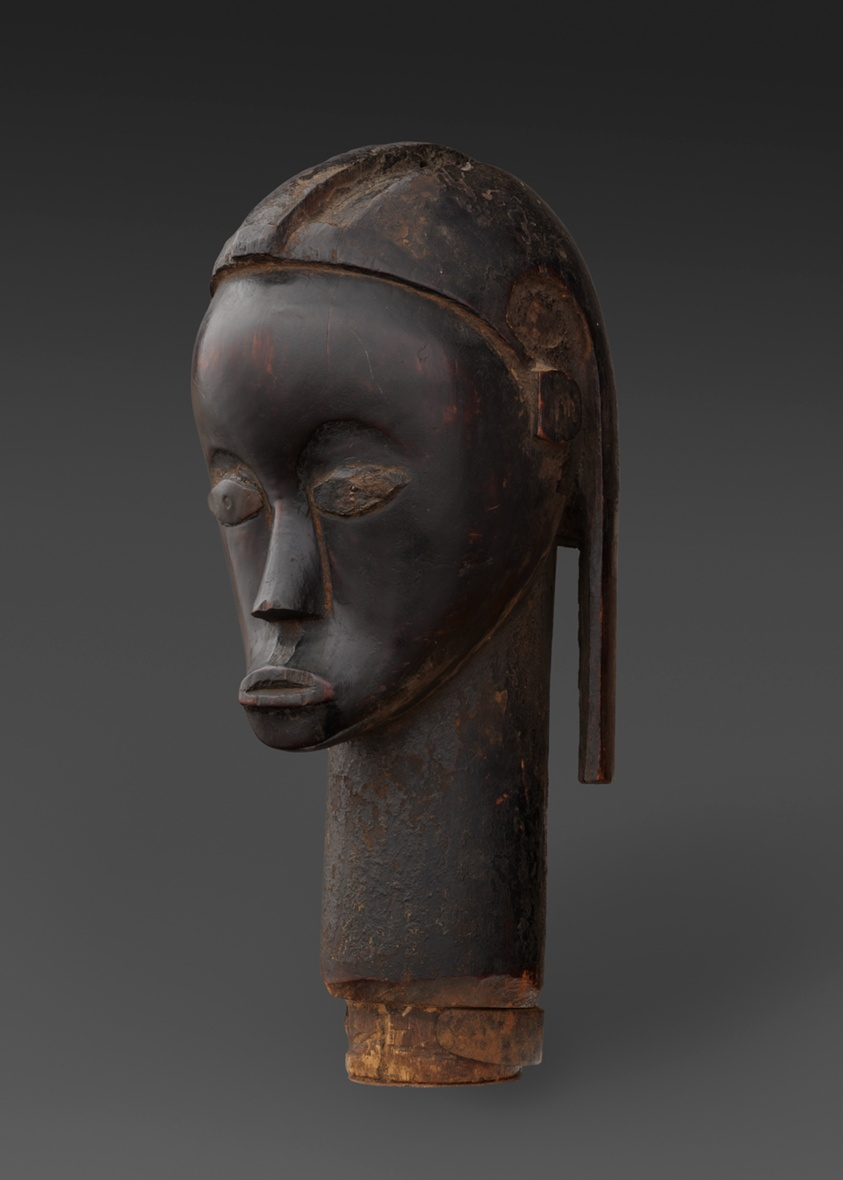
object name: Sculpture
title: Head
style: fang, Arts of Africa, african Art, Central Africa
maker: Fang; Gabon; Central Africa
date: Mid–late 19th century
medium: Wood and copper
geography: Gabon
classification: sculpture; wood; copper; arts of Africa; funerary; african art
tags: ancestors, abstract figures, death, protector, reliquary